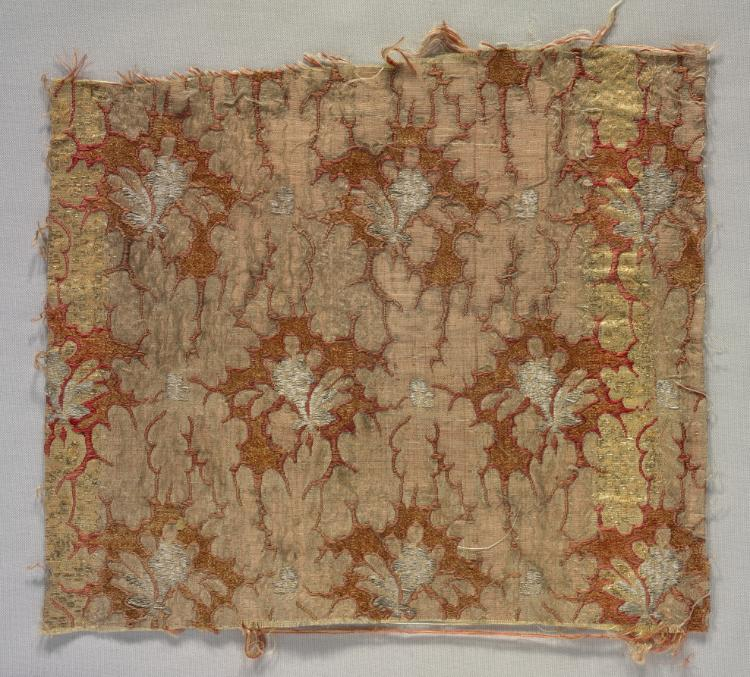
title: Silk Chenille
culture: Russia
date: 1700s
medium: fancy compound cloth, brocaded: silk and metal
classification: Textile